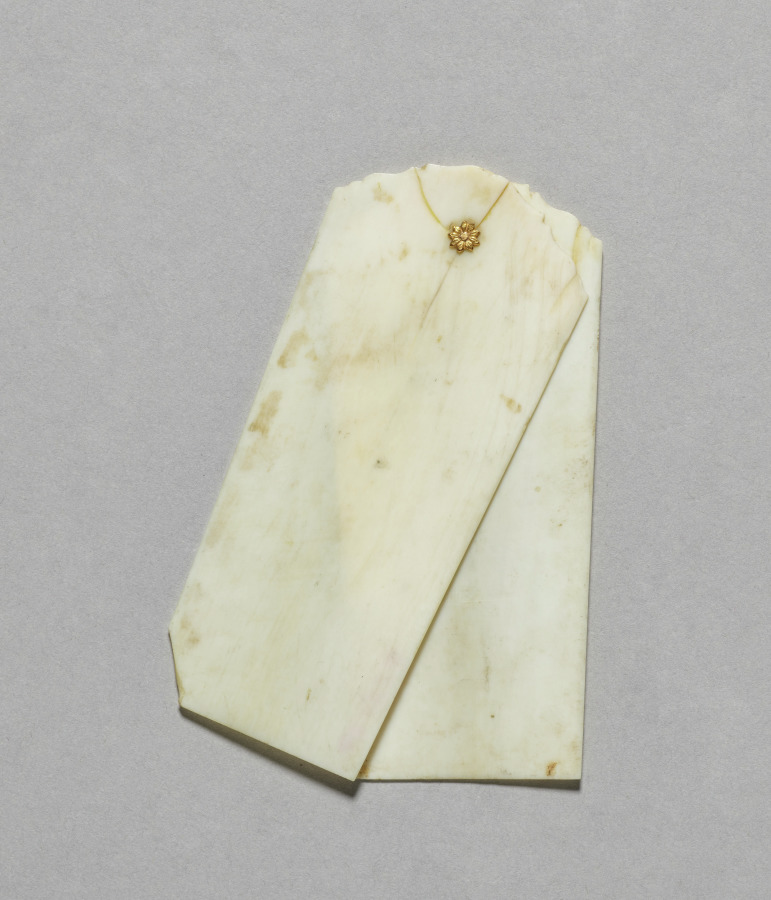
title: Note tablet from a Sewing Box (Nécessaire)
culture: Austria, possibly Vienna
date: c. 1765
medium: gold and mother-of-pearl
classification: Miscellaneous